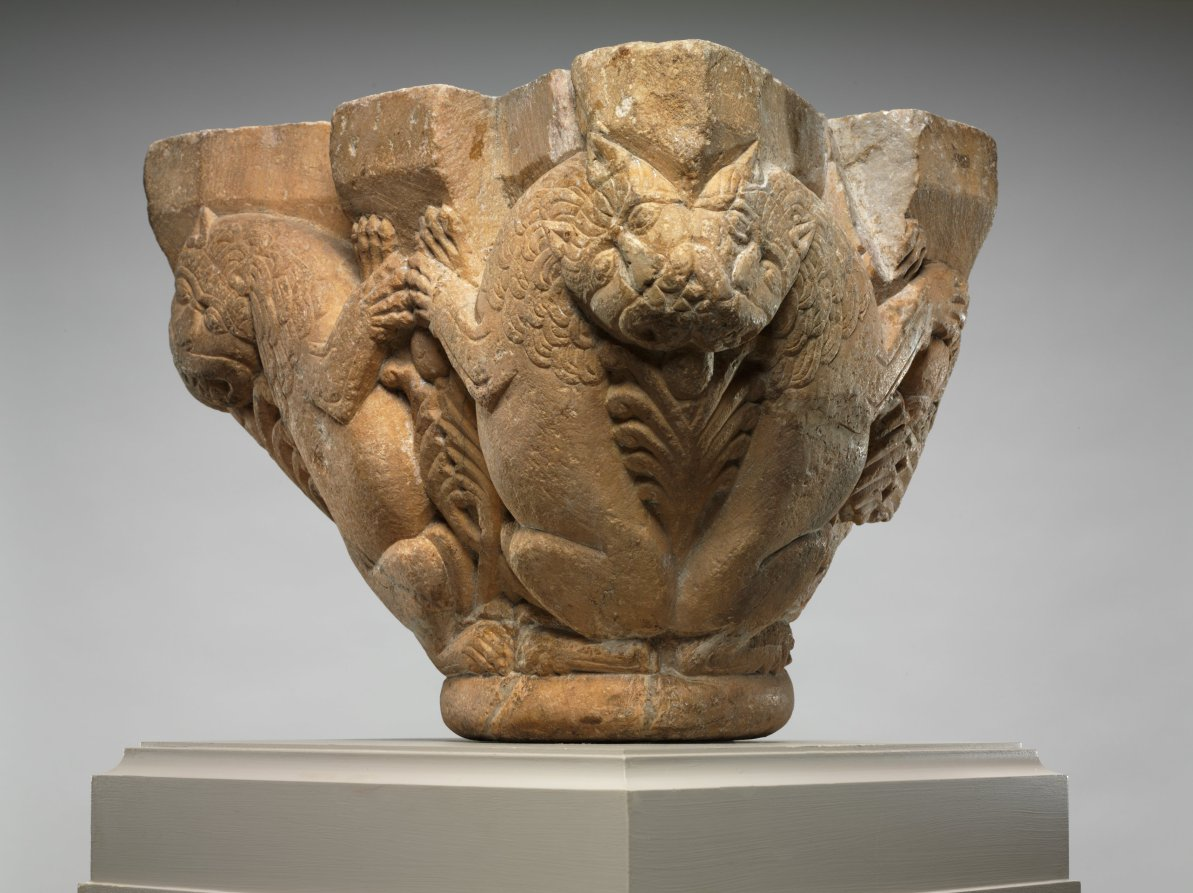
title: Engaged Capital with Lions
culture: Northern Spain (Navarre ?) or Southwest France (Pyrénées or Roussillon ?), mid-12th century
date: 1145–64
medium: marble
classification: Sculpture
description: The compositional motif of confronted and addorsed beasts illustrated on this capital was especially popular in churches along the pilgrimage roads.